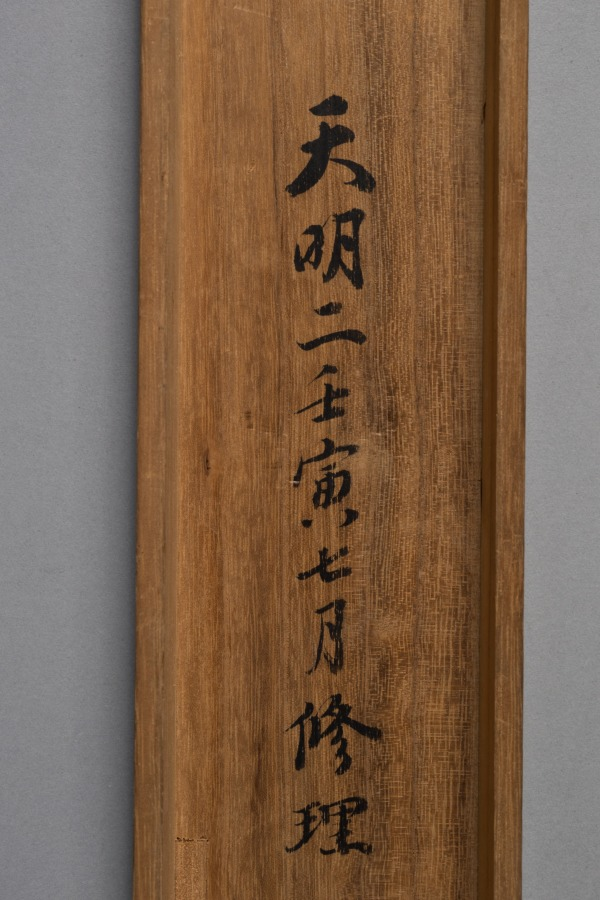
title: Landscape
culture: Japan, possibly Edo period (1615-1868)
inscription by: copy after Ishō Tokugan (Japanese, c. 1359–1437)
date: early 1600s to mid-1800s?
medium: hanging scroll; ink and slight color on paper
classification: Painting